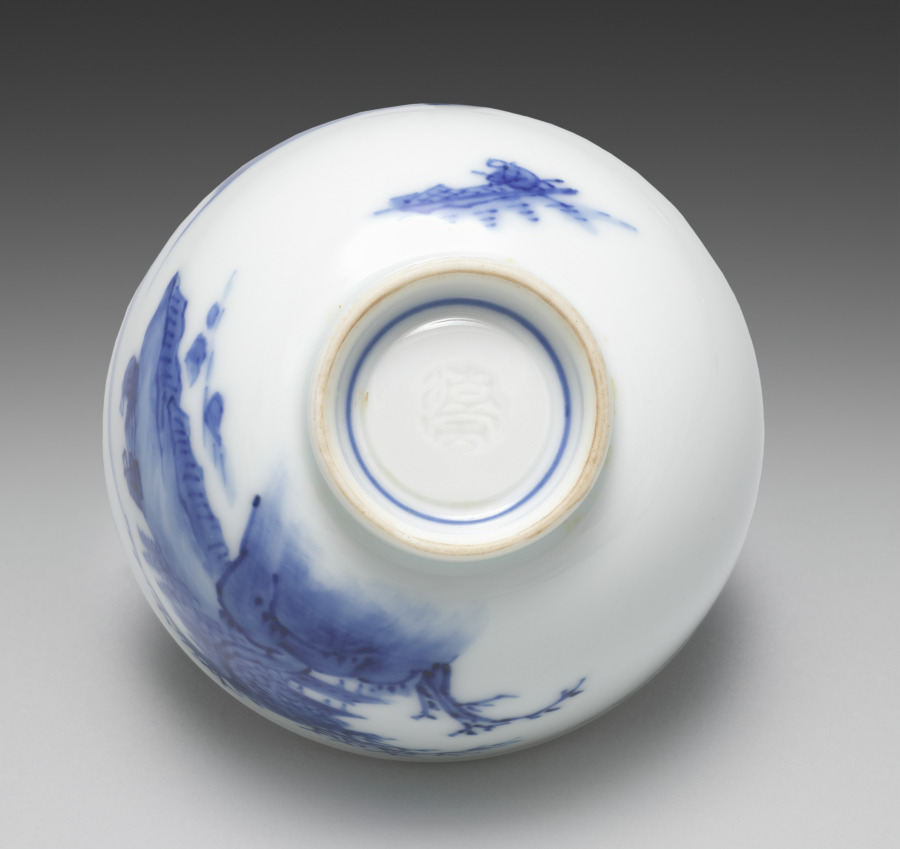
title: Teacup from Tea Set with Chinese Landscape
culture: Japan, Meiji period (1868–1912)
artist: Seifū Yohei III (Japanese, 1851–1914)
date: 1893–1914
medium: Porcelain with underglaze blue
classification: Ceramic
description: The theme of this sencha tea set is the Chinese scholar-recluse in an idyllic landscape. Each of the five teacups has a landscape with an architectural structure and some human activity. This tea set has a side-handled pot called a kyūsu, used for steeping, straining, and serving tea. Unlike some others, this set also has a yuzamashi, a container used to cool boiled water to just the right temperature for the best flavor when steeping. Seifū Yohei III’s painting teacher, Tanomura Chokunyū (1814–1907), made a visual record of famous sencha events that shows how these kinds of porcelains fit with objects such as a stove and kettle to form a complete set of utensils for tea preparation, and with ensembles of decorative objects meant to inspire creativity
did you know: This cup shows a man rowing a little skiff, which disturbs the otherwise still water. Behind him in the distance is an open-air pavilion. He is making his way toward a pair of figures playing a board game, much like the scene on the teapot. Down the hill from them is a residence; beyond this, a flock of geese approaches through the sky.